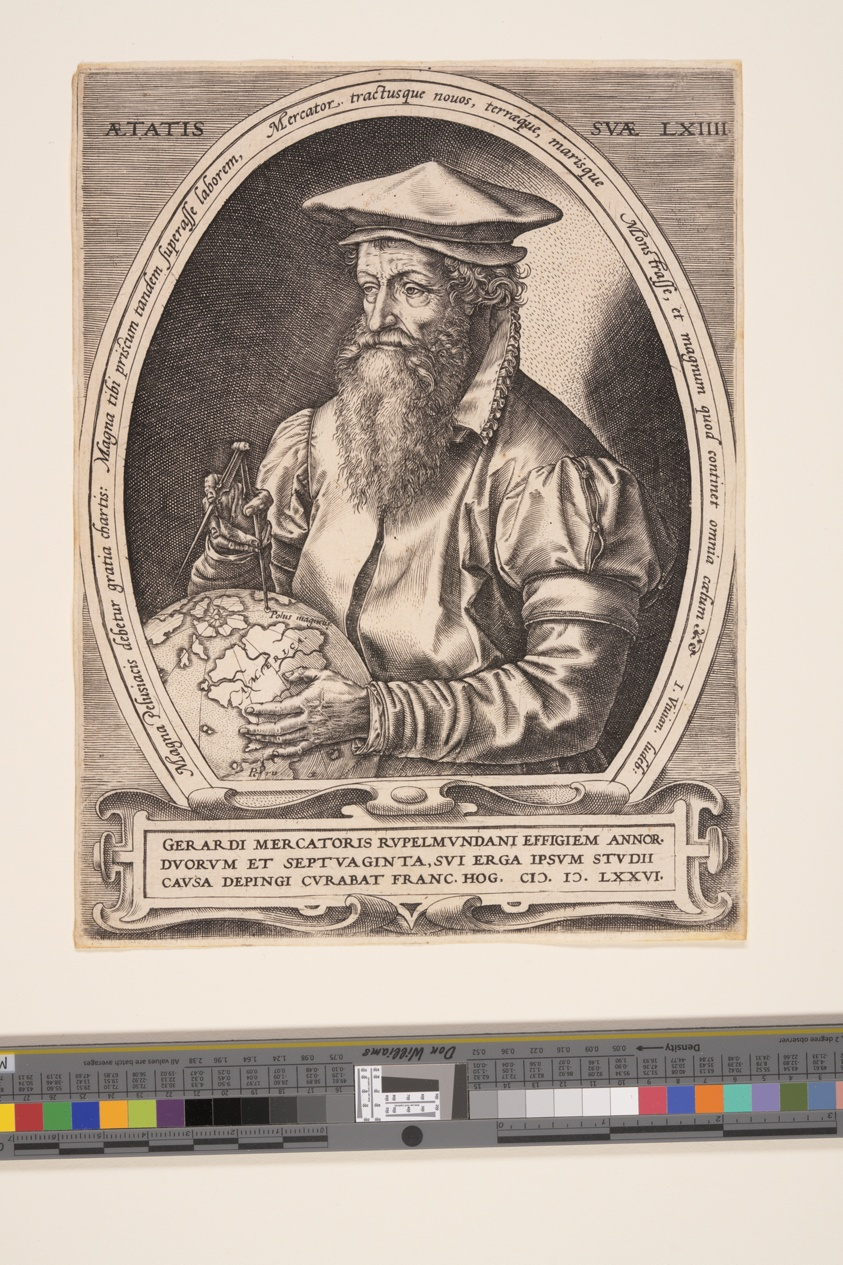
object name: Print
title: Gerardus Mercator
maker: Attributed to Hendrick Goltzius; Dutch, 1558–1617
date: 1576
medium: Engraving on laid paper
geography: Netherlands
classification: engraving; paper; print; prints and drawing